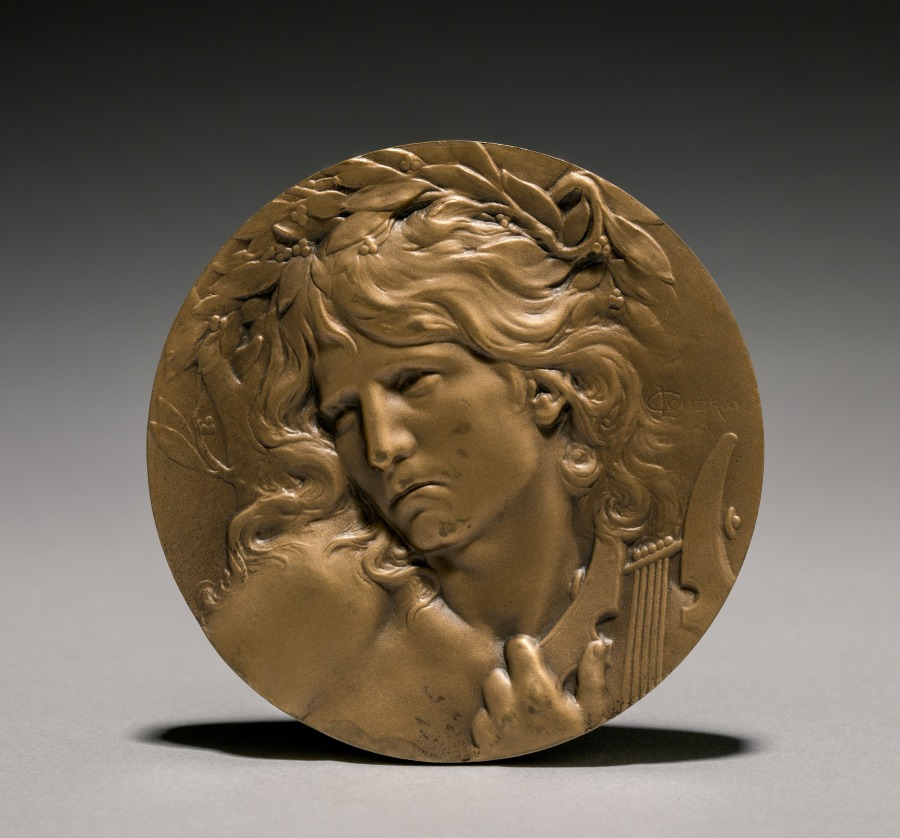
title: Medal (obverse)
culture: France, 20th century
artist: Marie Alexandre Lucien Coudray (French, 1864–1932)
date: 1900s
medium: bronze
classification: Metalwork